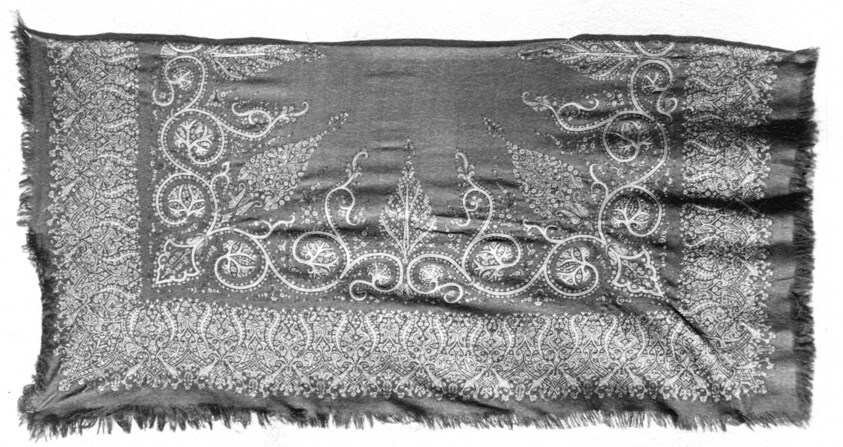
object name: Costume and Accessories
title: Shawl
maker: India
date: 19th century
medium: Embroidered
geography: India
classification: textile; weaving; costume; dress (garment); clothing